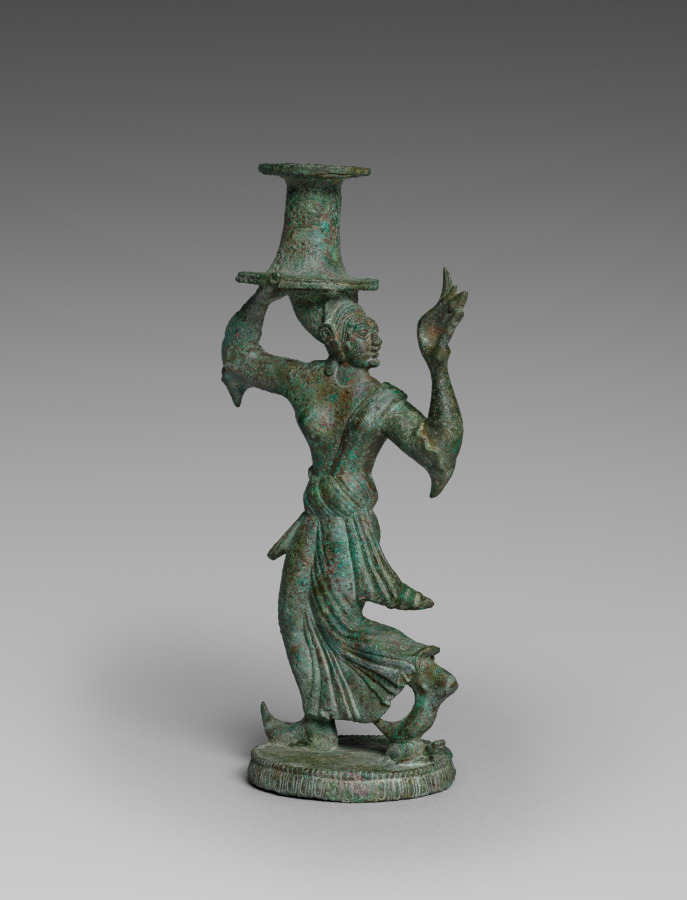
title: Candelabrum Stand of a Dancing Maenad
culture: Etruscan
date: 525–500 BCE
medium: bronze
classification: Sculpture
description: Conceived primarily in two dimensions—front and rear silhouette—this small bronze dancer probably once belonged to an elaborate candelabra or incense burner. The exaggeratedly long fingers and pointed shoes characterize the work as Etruscan, as do the stylized folds of the figure’s dress, which add visual interest but not verisimilitude. While her right hand holds above her head a cylindrical support, her left squeezes a small object, perhaps a fruit or clapper.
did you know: A small turtle beneath the figure’s back foot suggests a rustic setting.